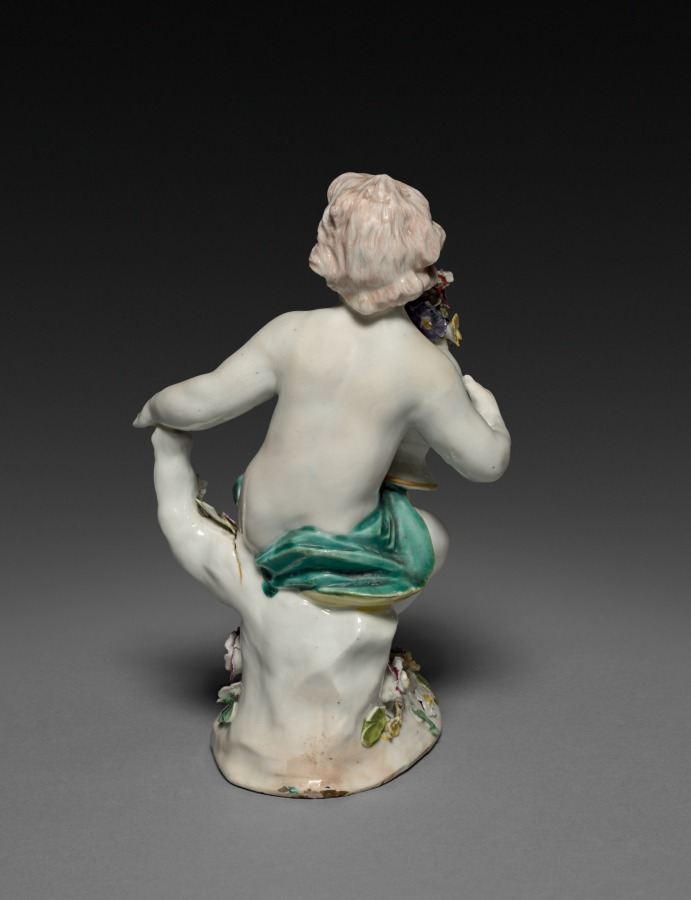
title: Spring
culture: England, Derby, 18th century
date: c. 1760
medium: soft-paste porcelain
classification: Ceramic